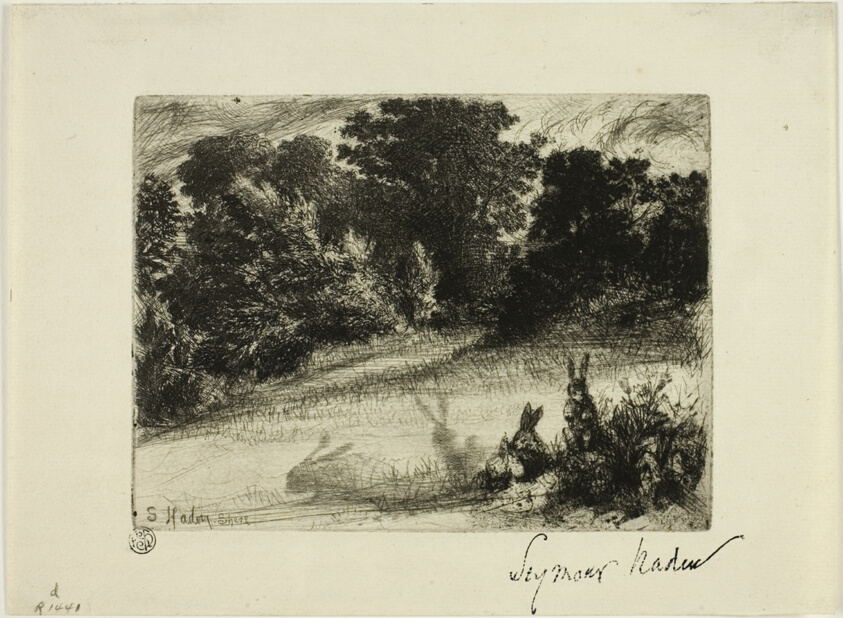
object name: Print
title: Combe Bottom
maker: Francis Seymour Haden (English, 1818-1910)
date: 1860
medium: Etching and drypoint on cream laid paper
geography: England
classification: etching; print; prints and drawing